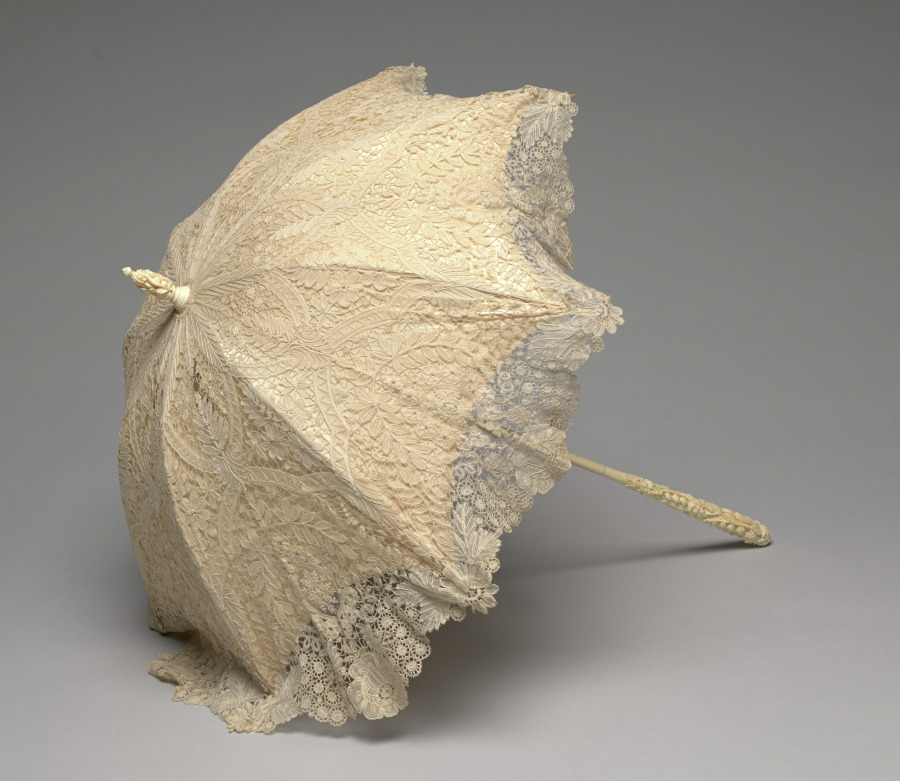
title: Lace Parasol with Ivory Handle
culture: Belgium, Brussels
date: 1880–99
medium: Needle lace and bobbin lace (Point Duchesse Lace) with carved ivory handle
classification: Lace